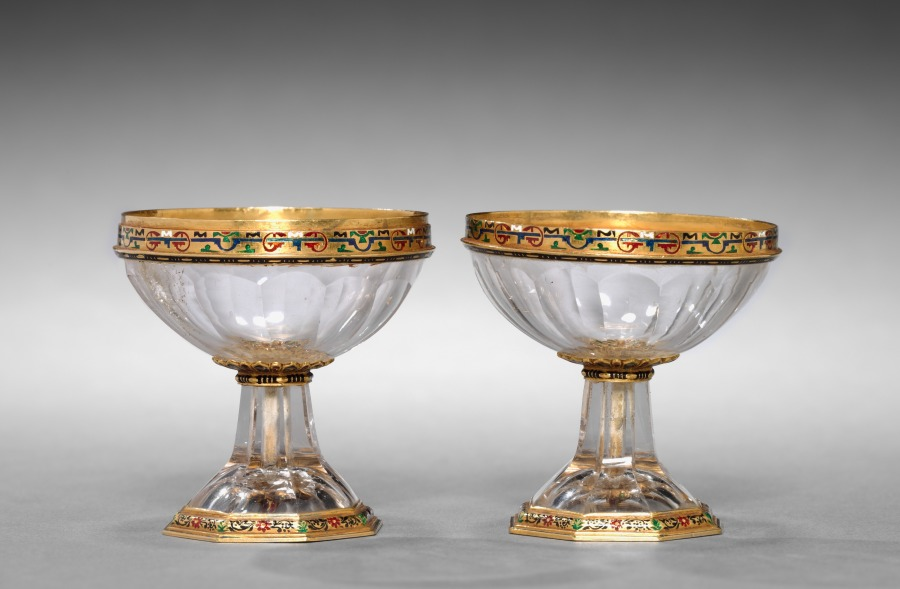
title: Double Cup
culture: Italy, late 16th century (possibly 19th century forgery, or 16th and 19th century pastiche)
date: late 16th century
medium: rock crystal set in enameled gold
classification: Enamel